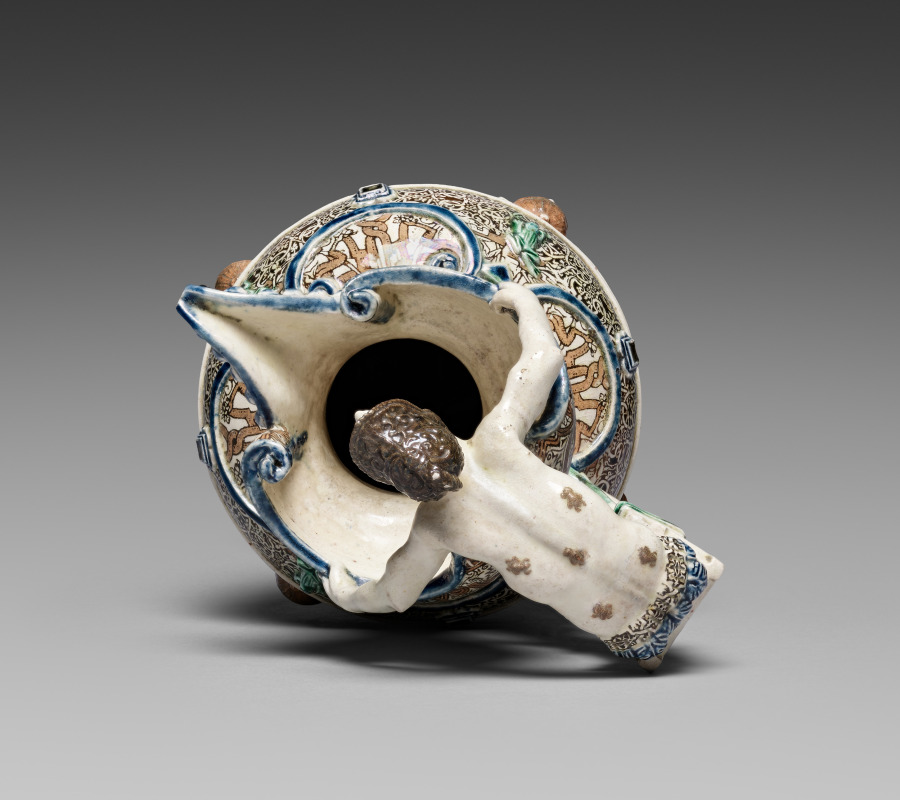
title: Ewer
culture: France, 16th century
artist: Saint-Porchaire (French)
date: c. 1540–67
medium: lead-glazed, white-paste earthenware with inlaid slip decoration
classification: Ceramic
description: An example of one of the most extravagant wares of this kind, this ewer is decorated with applied masks and frogs as well as a variety of stamped and inlaid designs. The shape and patterns reflect the metalwork of the time—the final period of this artistic pottery.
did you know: The green tree frog was one of the symbols of French King Henri II, indicating that this ewer may have either been made for the king or one of his courtiers.